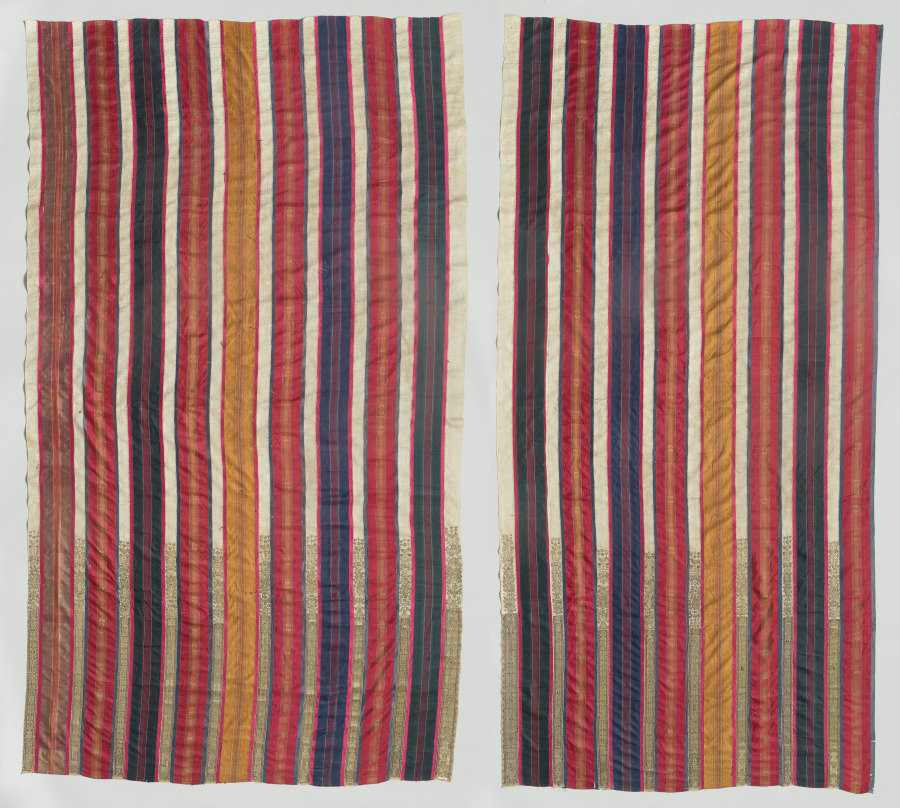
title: Curtain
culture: Africa, North Africa, Tunisia, Djerba, Tunisian weaver(s) and embroiderer(s)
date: 1600s–1700s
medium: Silk, linen, metal, and dye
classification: Embroidery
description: This pair of curtains displays colorful silk bands with woven geometric motifs, and cream bands with gold-embroidered plants, birds, six-pointed stars, and the khamsah (خمسة), an open five-fingered hand. Birds and the tree of life were popular good luck or fertility symbols linked to marriage. The cosmopolitan motifs would have resonated with Jews, Muslims, and Christians alike, reflecting its creation on multiethnic and multireligious Djerba, an island off the Tunisian coast. There, both goldsmithing and gold thread embroidery were done by Jewish artisans (male and female, respectively). The fine materials suggest they once hung in a wealthy home or for special occasions; interior wall hangings were typically made from rough wool.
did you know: When first acquired over a century ago, these curtains had fringe at their lower ends.